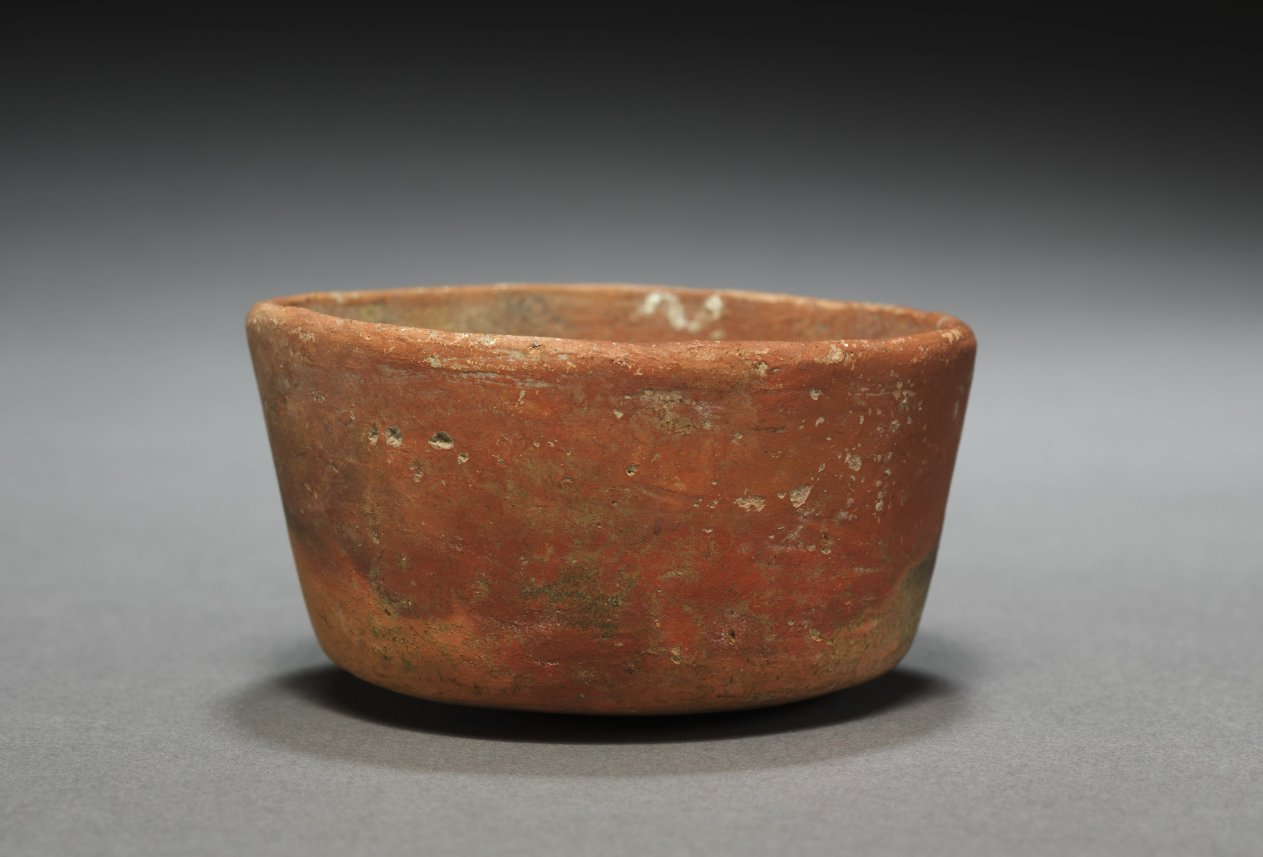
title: Cup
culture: Iran, Luristan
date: 3000–2000 BCE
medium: earthenware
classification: Ceramic